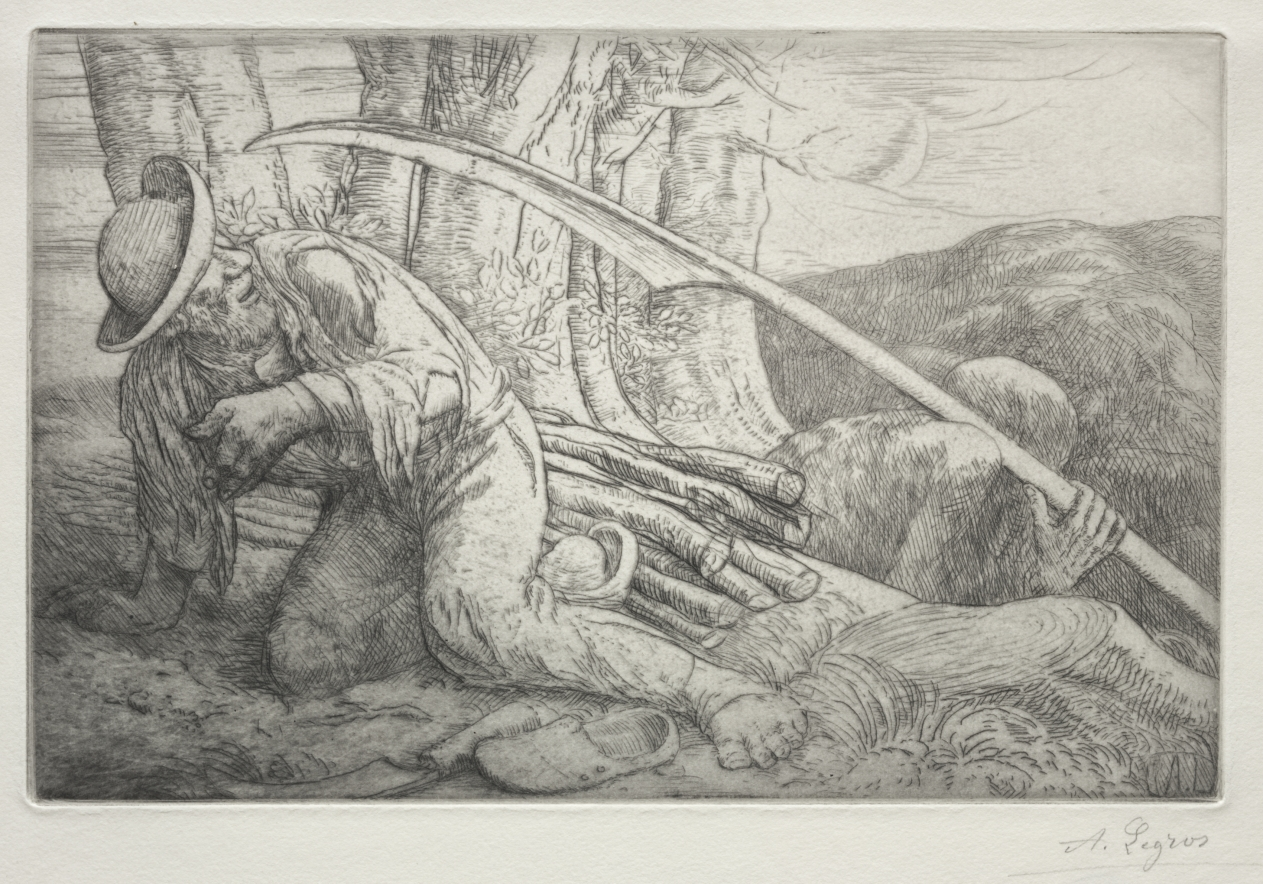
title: La Mort et le Bûcheron (5th Plate)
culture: France, 19th-20th century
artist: Alphonse Legros (French, 1837–1911)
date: c. 1857–1911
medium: etching and drypoint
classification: Print